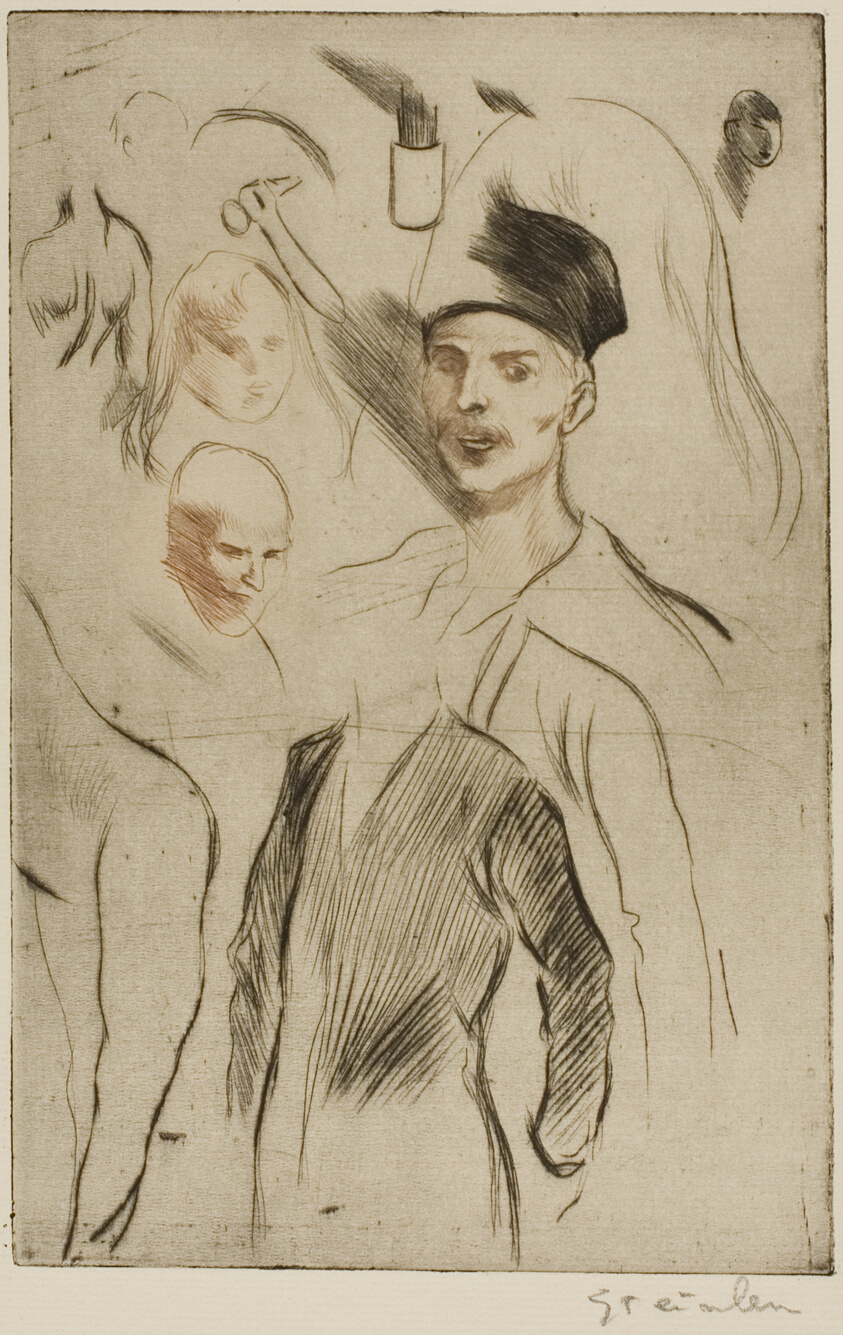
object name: Print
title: Plate of Sketches, no. 2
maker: Théophile-Alexandre Steinlen; French, born Switzerland, 1859-1923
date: 1898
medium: Drypoint from a zinc plate printed à la poupée in black and red-brown on ivory laid paper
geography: France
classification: drypoint; print; prints and drawing